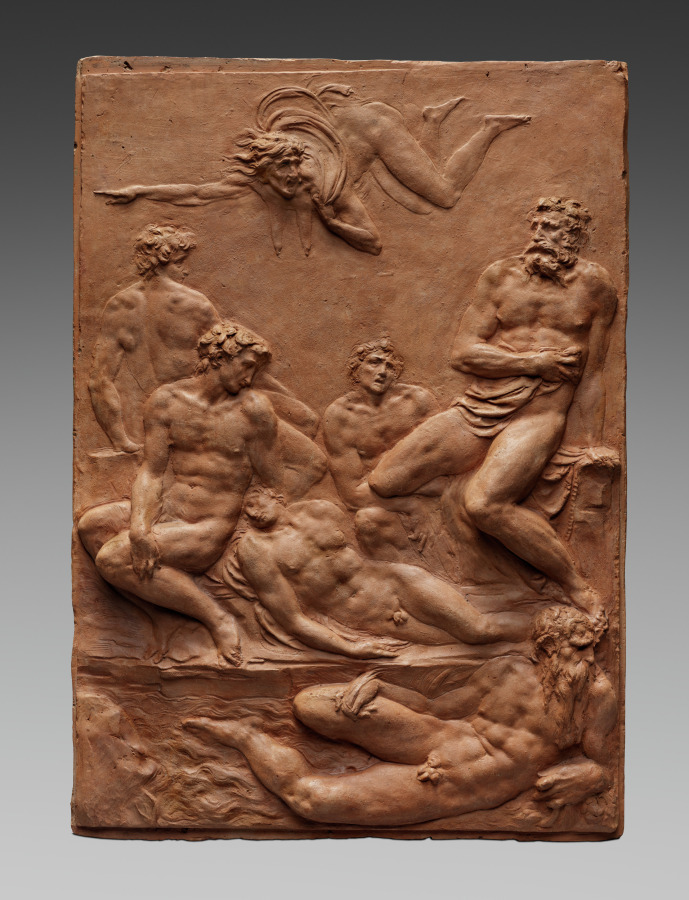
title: The Death of Count Ugolino della Gherardesca and His Sons (Inferno Canto XXXIII)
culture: Italy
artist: Pierino da Vinci (Italian, 1530–1553)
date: c. 1550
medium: Terracotta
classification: Sculpture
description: Pierino da Vinci's dramatic relief depicts a scene from a poem that was based on an actual historical event. In 1289, following a political coup in Pisa, Italy, Count Ugolino and his sons were imprisoned in a tower and left to starve; their tragic tale inspired Dante Alighieri, who featured Ugolino in the Divine Comedy, an epic narrative tracing Dante’s imagined journey through hell, purgatory, and heaven. Pierino reimagined the story, placing the despondent figures along the banks of the Pisan river and adding a monstrous flying character representing hunger.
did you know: Leonardo da Vinci’s nephew Pierino was considered the heir to his uncle’s artistic genius.